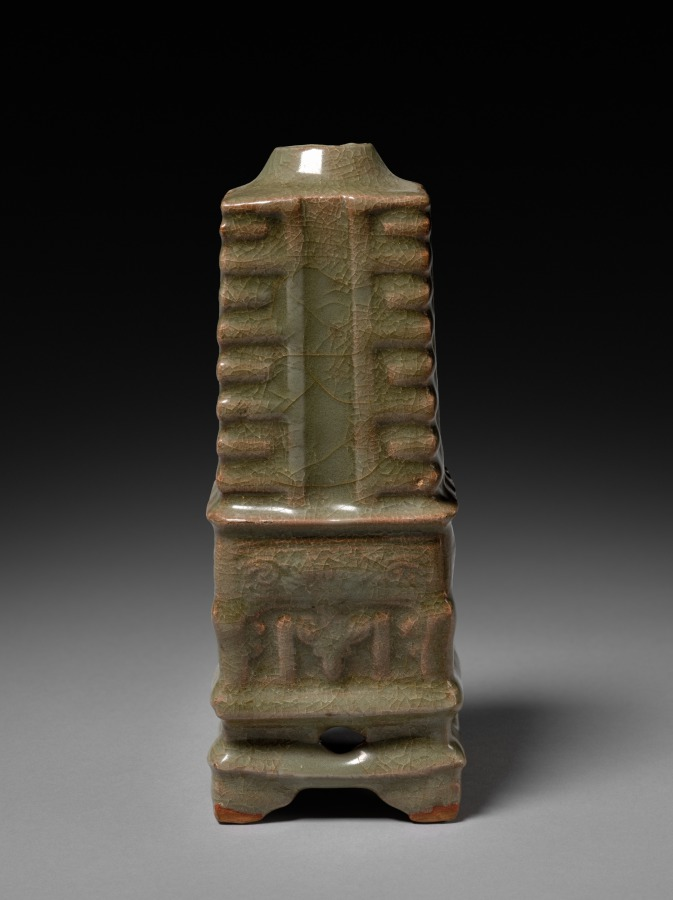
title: Vase in Shape of Cong: Southern Celadon Ware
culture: China, Zhejiang province, Yuan dynasty (1271-1368)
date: 1271–1368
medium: glazed buff stoneware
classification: Ceramic